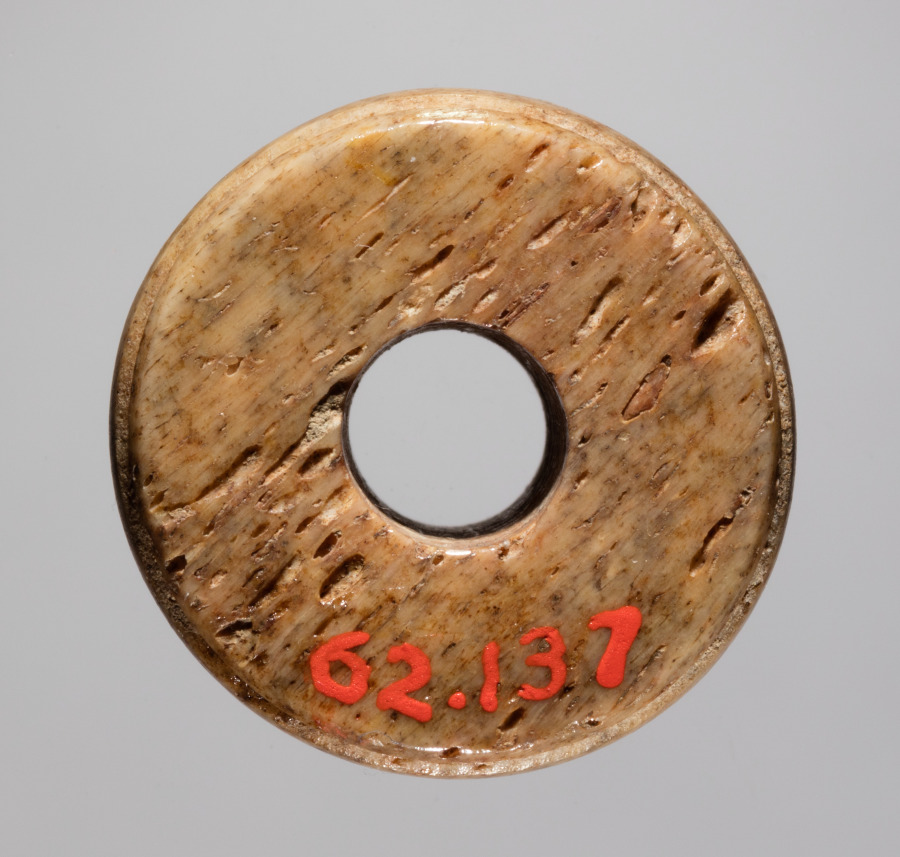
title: Spindle Whorl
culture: Iran, early Islamic period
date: 700s - 900s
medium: bone, incised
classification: Spindle Whorl